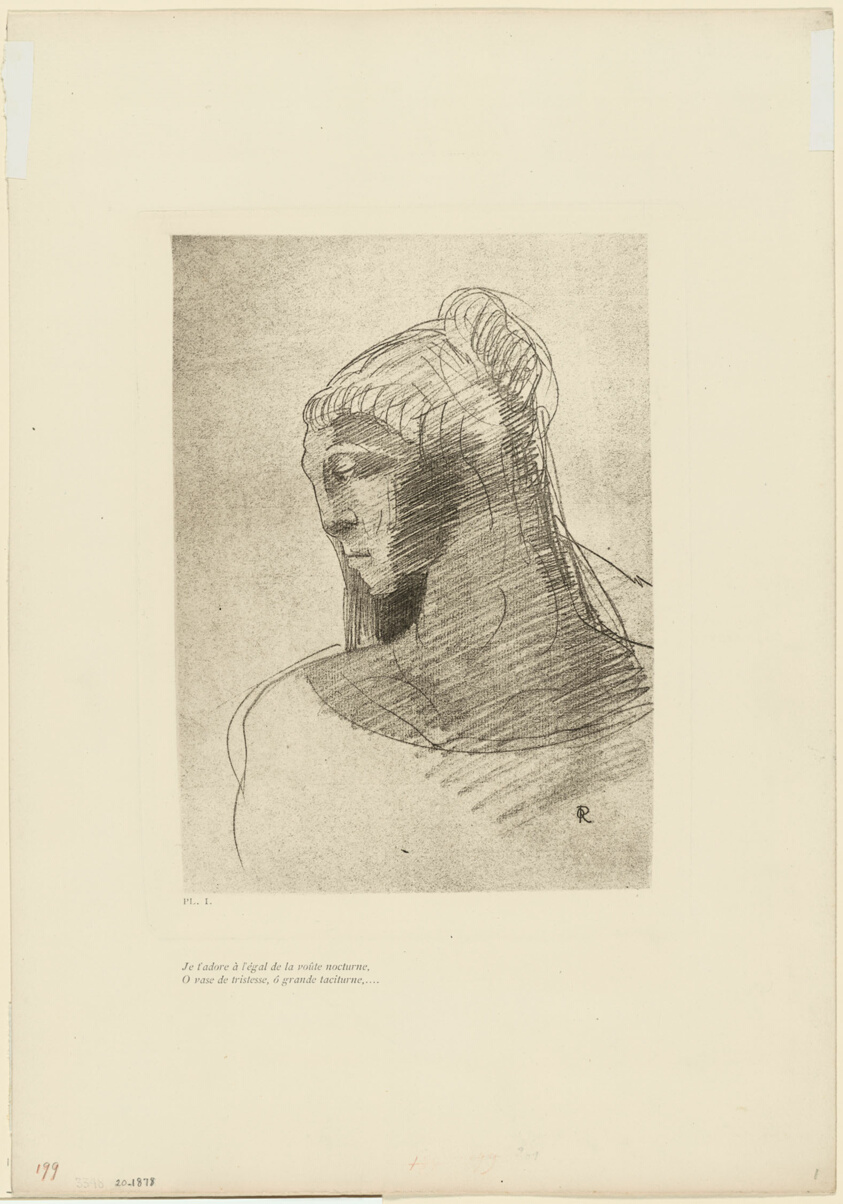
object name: Print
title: I Adore You as I Adore the Vault of the Night Sky, O Vessel of Sadness, O Tall Silent Woman, plate 2 of 9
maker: Odilon Redon (French, 1840-1916)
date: 1890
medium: Photogravure made from an original drawing, in black on ivory wove paper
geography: France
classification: photogravure; reproduction; prints and drawing; print; paper